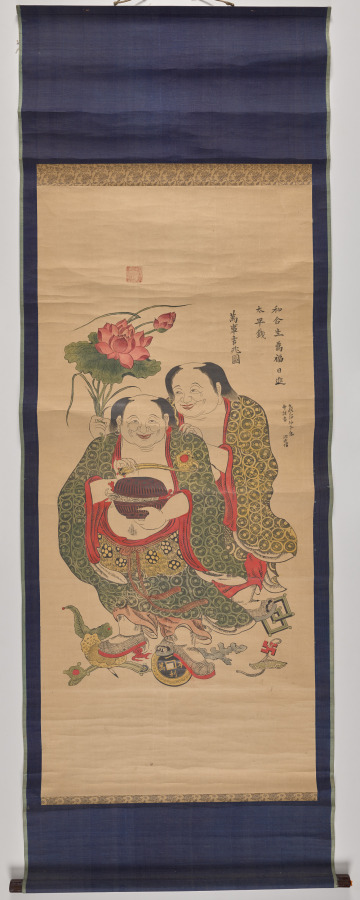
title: The Two Immortals of Harmony and Unity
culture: China, Qing dynasty (1644–1911), Qianlong reign (1736–95)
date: 1736–95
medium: Hanging scroll; polychrome woodblock print; ink and color on paper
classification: Print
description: Woodblock printing in color reached a height in China in the 1600s to 1700s. The prints were executed by means of sets of separate blocks, each carved to print a different color.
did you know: In the 1600s, printing flourished in such Jiangnan cities as Nanjing, Suzhou, Hangzhou, and Huizhou, evolving from privately enjoyed illustrated books printed in color to more commercialized single-sheet color prints that were hung on walls and became part of the rich urban visual culture.